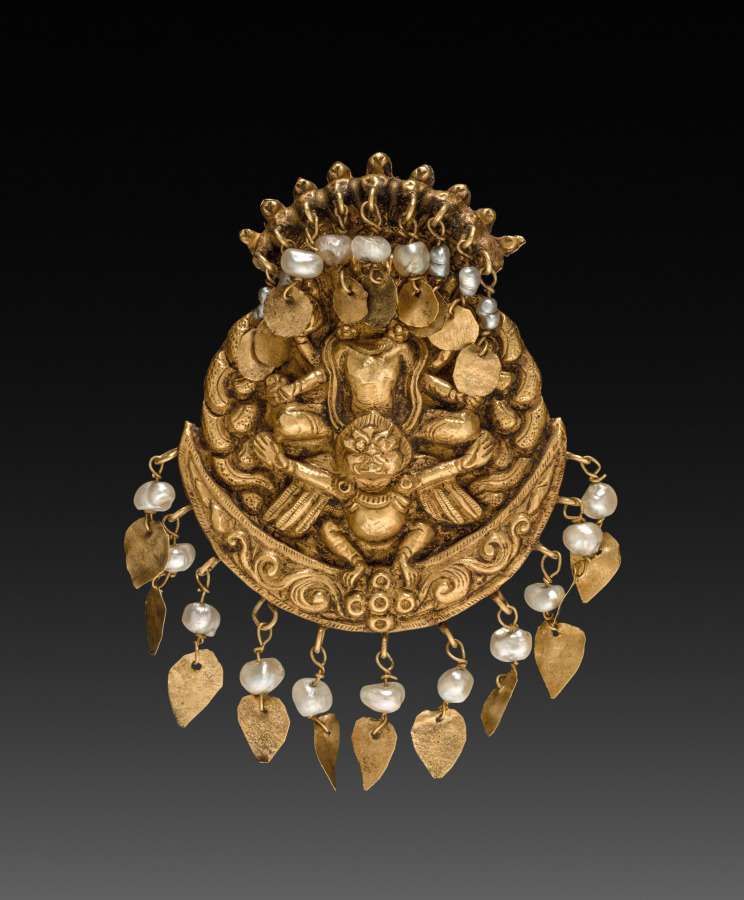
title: Earring with Four-Armed Vishnu Riding Garuda with Nagas (serpent divinities)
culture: Nepal, Kathmandu Valley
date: 1600s or 1700s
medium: repousse gold with pearls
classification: Jewelry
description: In Nepal, sculptures of deities were adorned with jewelry larger than pieces made for human beings. This pair of earrings features the Hindu god Vishnu seated cross-legged riding his mount the man-eagle Garuda. Garuda's arms are outstretched, grabbing the tails of serpents whose braided bodies snake up both sides of each earring. His wings drape like a cape behind him, and his talons clutch his crescent moon perch. Serpent hoods rise up behind Vishnu like a canopy.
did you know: Vishnu and Garuda are solar deities, and they sit on the crescent moon, so the light of both celestial bodies shines from these earrings.